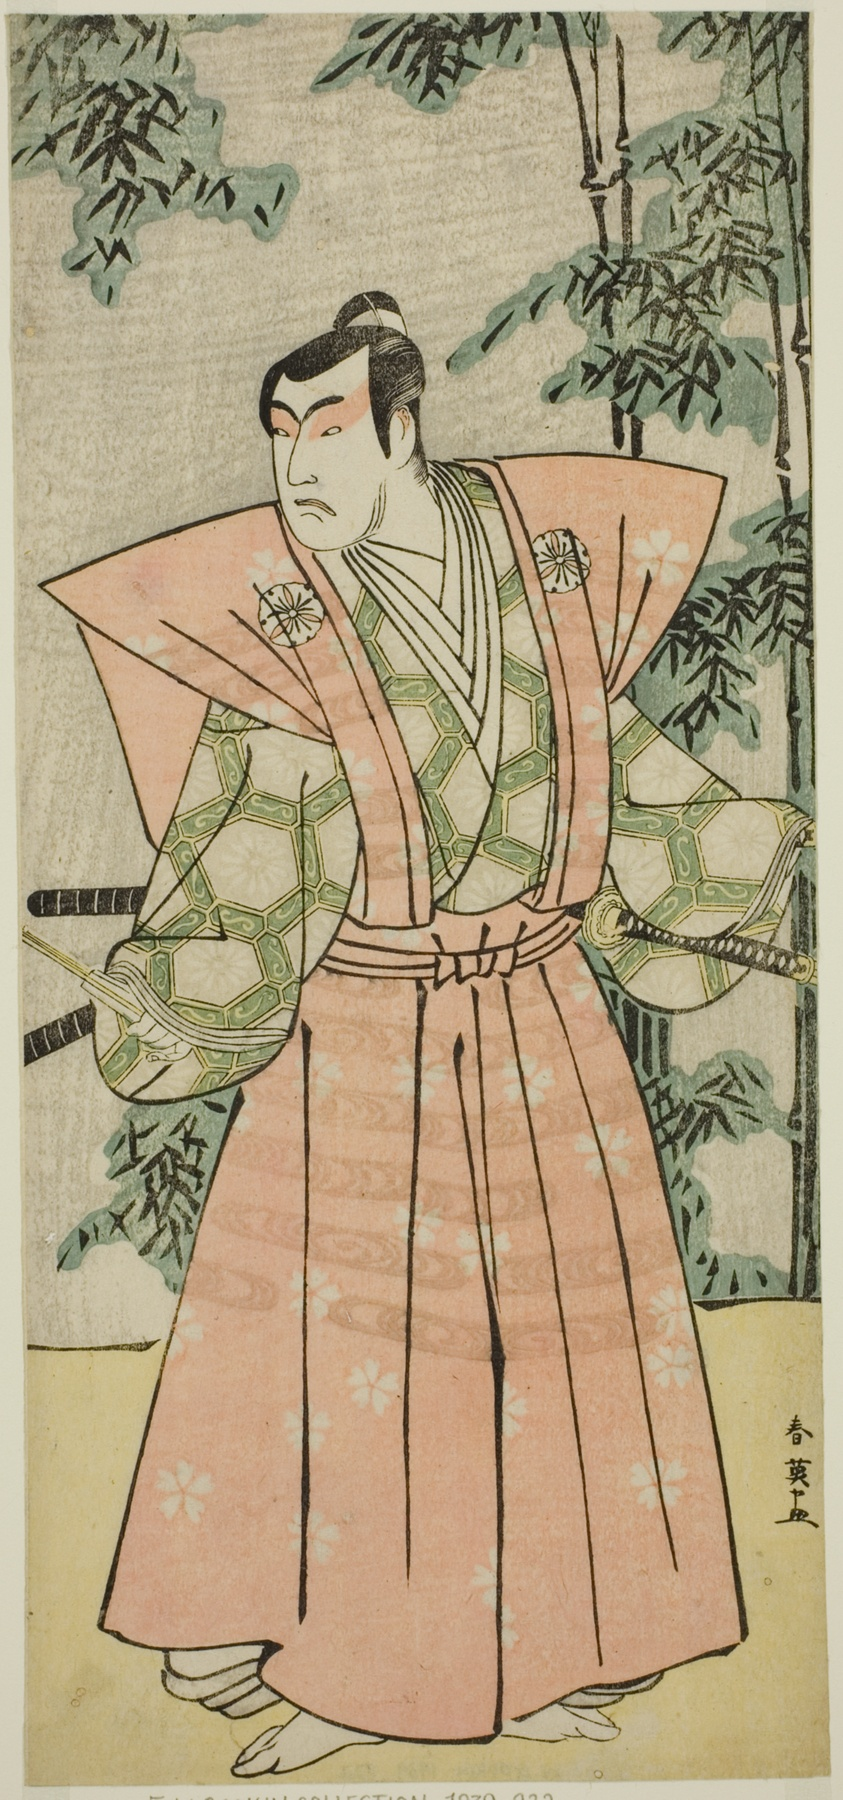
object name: Print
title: The Actor Matsumoto Koshiro IV as Hatakeyama Shigetada Disguised as Honjo Soheiji (?) in the Play Edo no Fuji Wakayagi Soga (?), Performed at the Nakamura Theater (?) in the First Month, 1789 (?)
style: Japanese (culture or style)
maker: Katsukawa Shun'ei (Japanese, 1762-1819)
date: c. 1789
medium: Color woodblock print; hosoban; from a multisheet composition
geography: Japan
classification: woodblock print; print; asian art